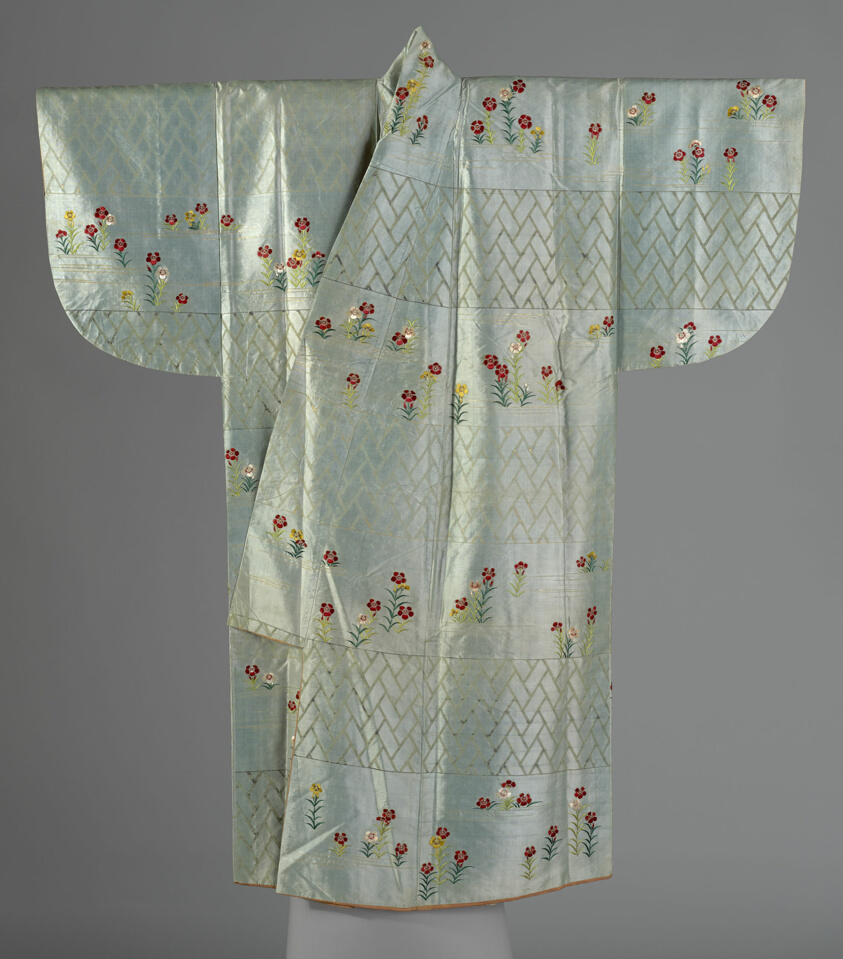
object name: Costume and Accessories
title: Nuihaku (Noh Costume)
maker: Japan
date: late 17th/ early 18th century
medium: Silk, plain weave; stamped with gold and silver leaf over adhesive (inkin); emroidered with silk in satin and couching stitches; lined with silk, plain weave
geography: Japan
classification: needlework (visual works); weaving - printed; costume